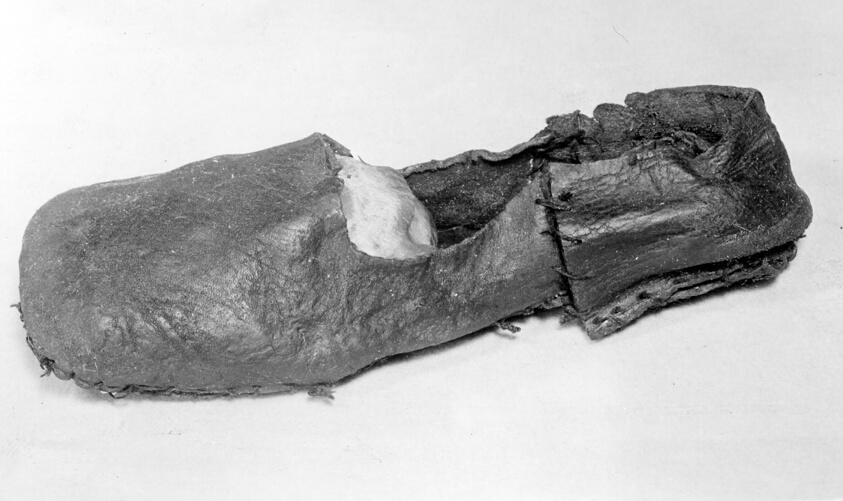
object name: Textile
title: Shoe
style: elizabethan, tudor, european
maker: England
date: 16th century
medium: Leather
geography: England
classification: textile; costume accessory - shoe; shoes - misc; costume; dress (garment); clothing